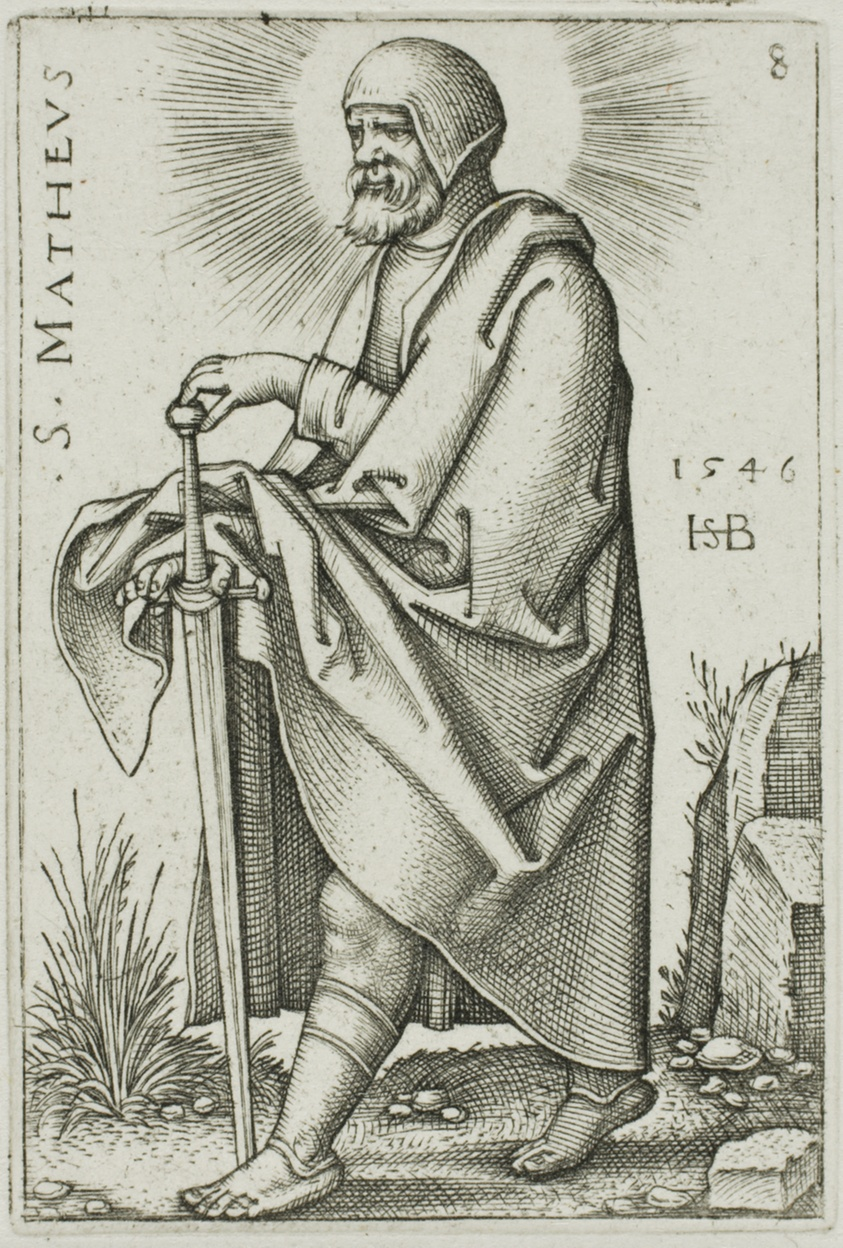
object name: Print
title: St. Matthew, plate 8 from The Twelve Apostles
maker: Sebald Beham; German, 1500-1550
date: 1545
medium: Engraving in black on white wove paper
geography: Germany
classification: engraving; print; prints and drawing